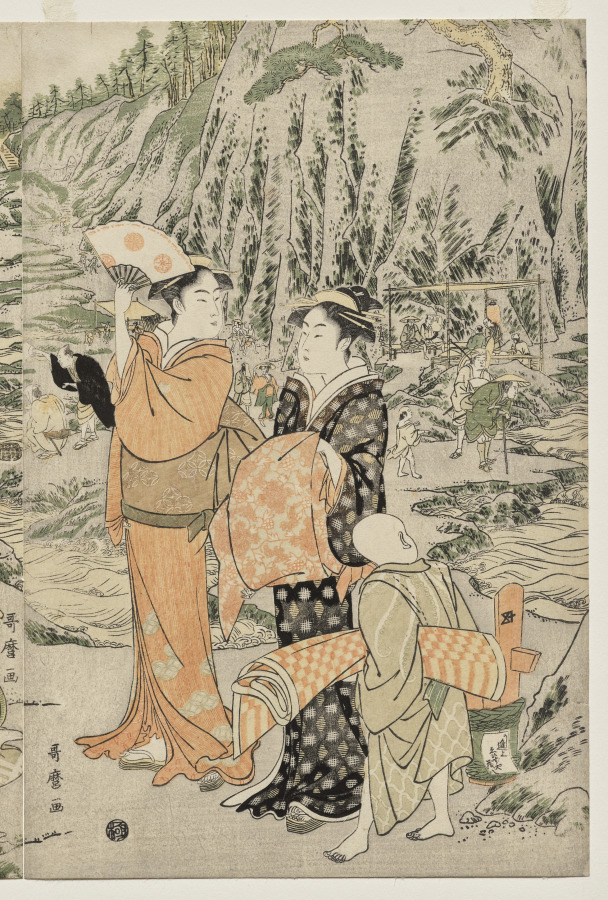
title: Fishing at Iwaya on Enoshima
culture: Japan, Edo period (1615–1868)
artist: Kitagawa Utamaro (Japanese, c. 1754–1806)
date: c. 1790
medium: color woodblock print from a triptych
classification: Print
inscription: Signature: Utamaro ga Censorship Seal: kiwame